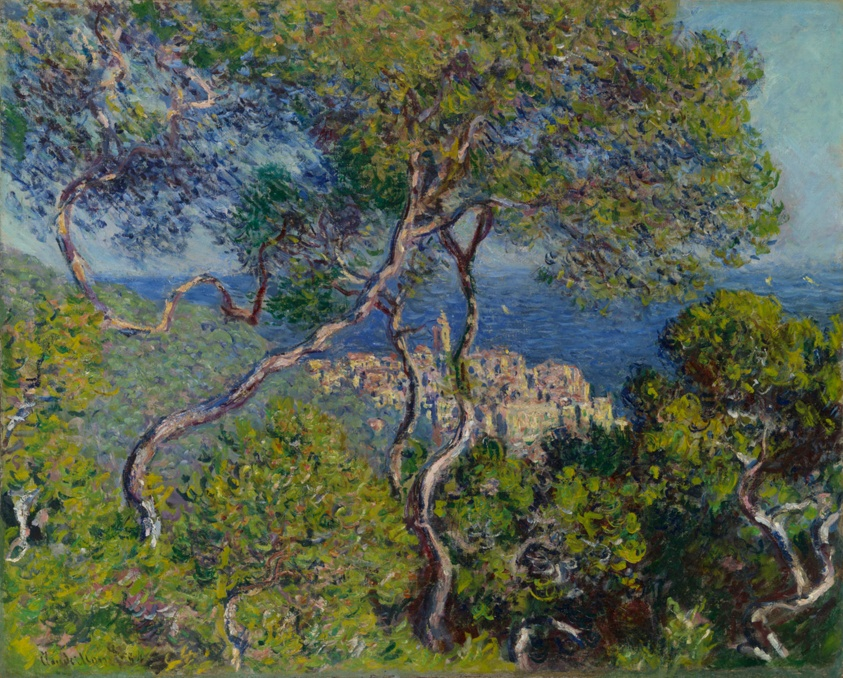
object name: Painting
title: Bordighera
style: Impressionism, nineteenth century, 19th century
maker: Claude Monet (French, 1840–1926)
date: 1884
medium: Oil on canvas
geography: France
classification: painting; paint; oil paintings (visual works); oil on canvas; french; european painting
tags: landscapes, trees, nature, towns, France, green (color), blue (color), weather/seasons, water, Century of Progress, world's fairs, Chicago World's Fairs